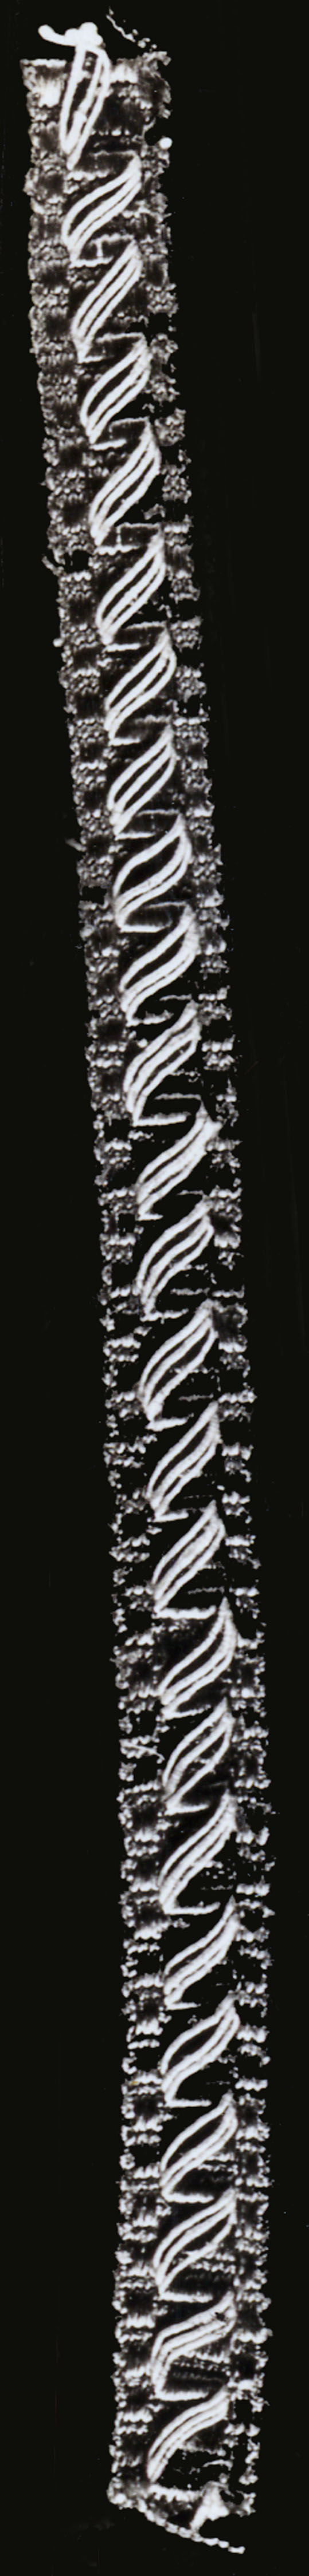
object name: Textile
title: Galloon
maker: Italy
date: 18th century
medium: velvet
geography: Italy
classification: textile; weaving